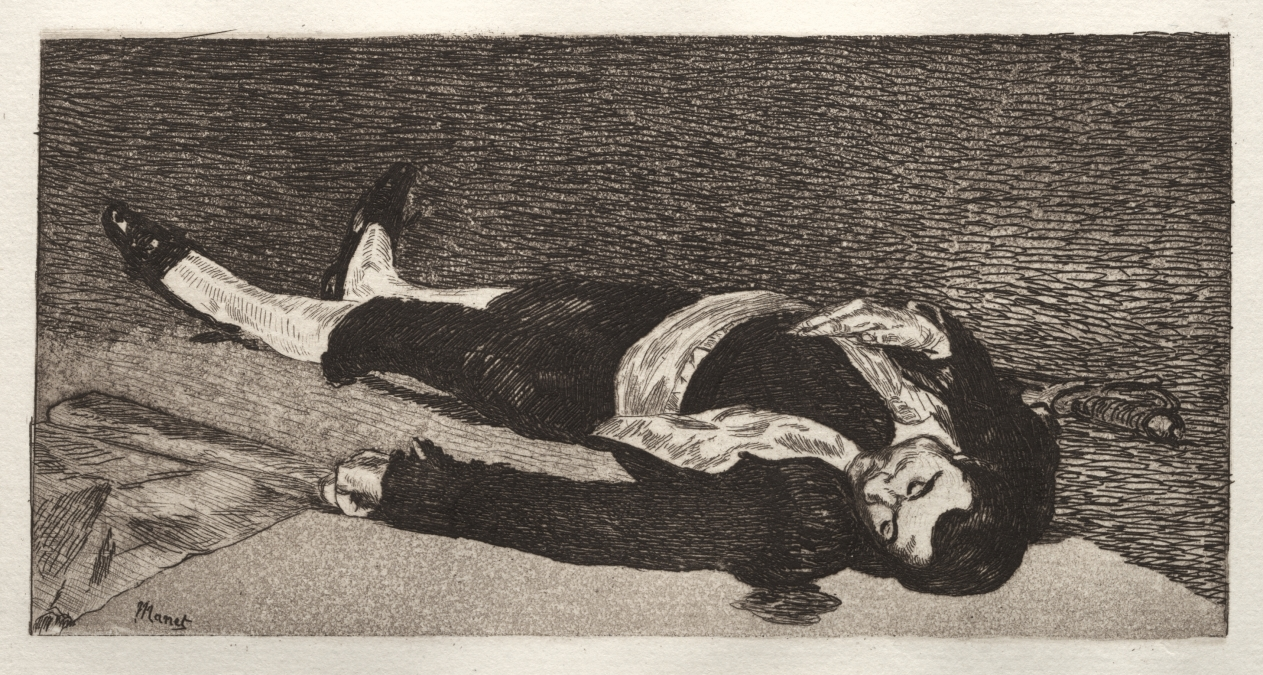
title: Torero mort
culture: France, 19th century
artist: Édouard Manet (French, 1832–1883)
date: 1868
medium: etching and aquatint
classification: Print